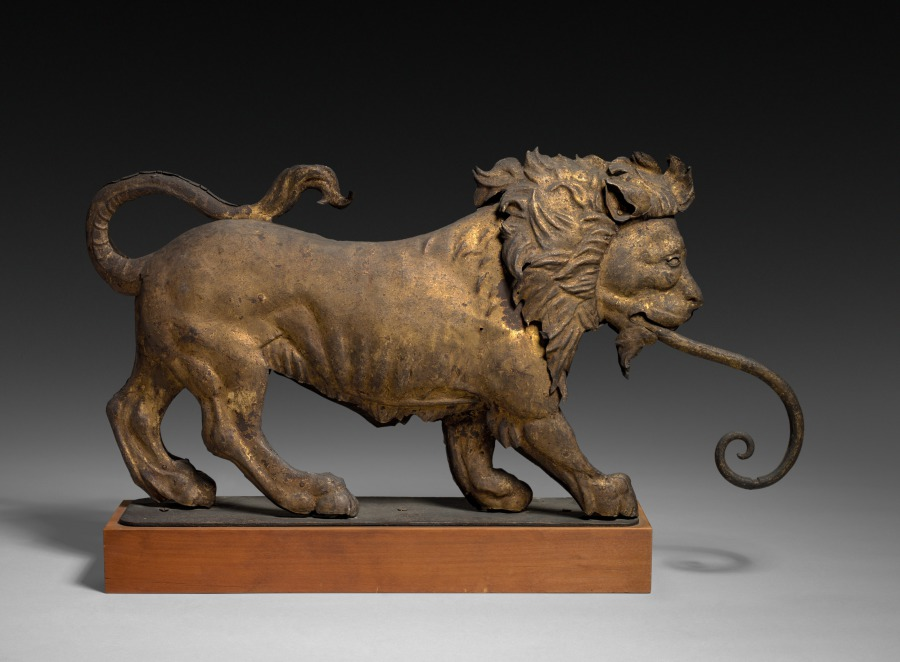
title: Lion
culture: Italy, 17th century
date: 1600s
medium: wrought iron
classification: Metalwork